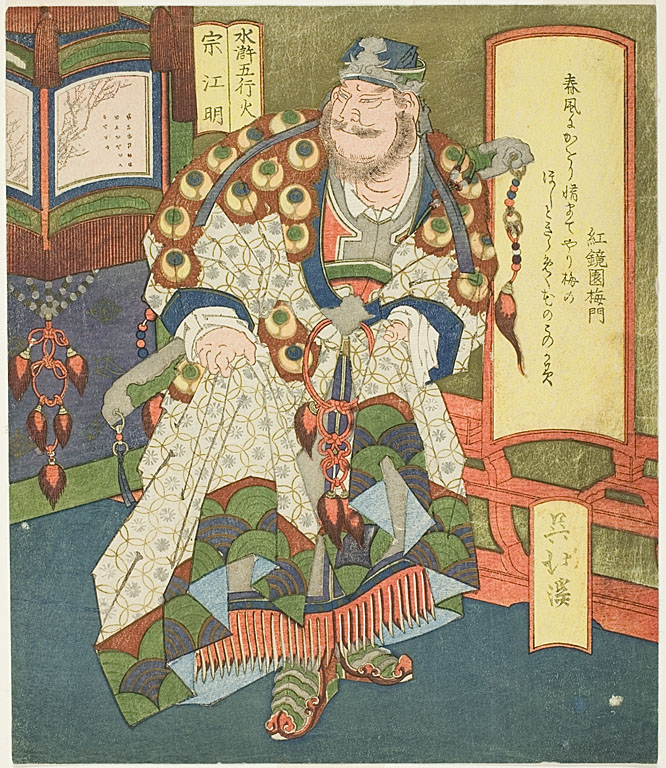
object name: Print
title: Fire: Song Jiangming (Ka, Sokomei), from the Series "Shuihuzhuan Heroes for the Five Elements (Suiko gogyo)"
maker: Totoya Hokkei (Japanese, 1780-1850)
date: early 1830s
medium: Color woodblock print; surimono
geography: Japan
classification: woodblock print; print; asian art